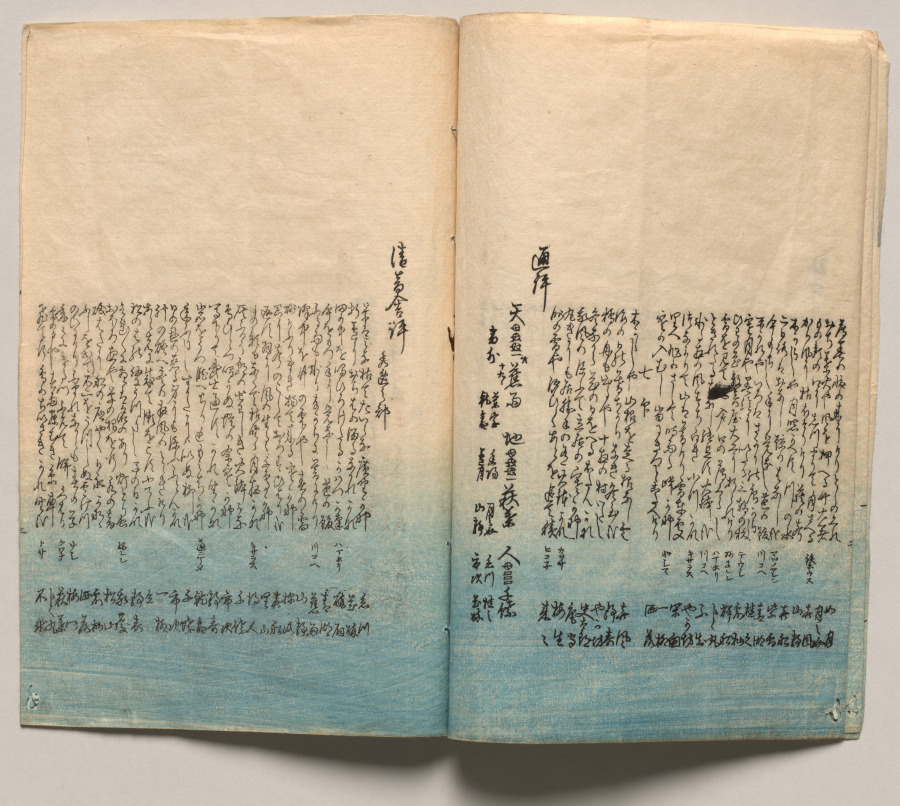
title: Spread Three from Verses for Winter and Spring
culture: Japan, Edo period (1615–1868)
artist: Utagawa Hiroshige (Japanese, 1797–1858)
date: 1850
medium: Woodblock printed book; ink and color on paper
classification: Bound Volume